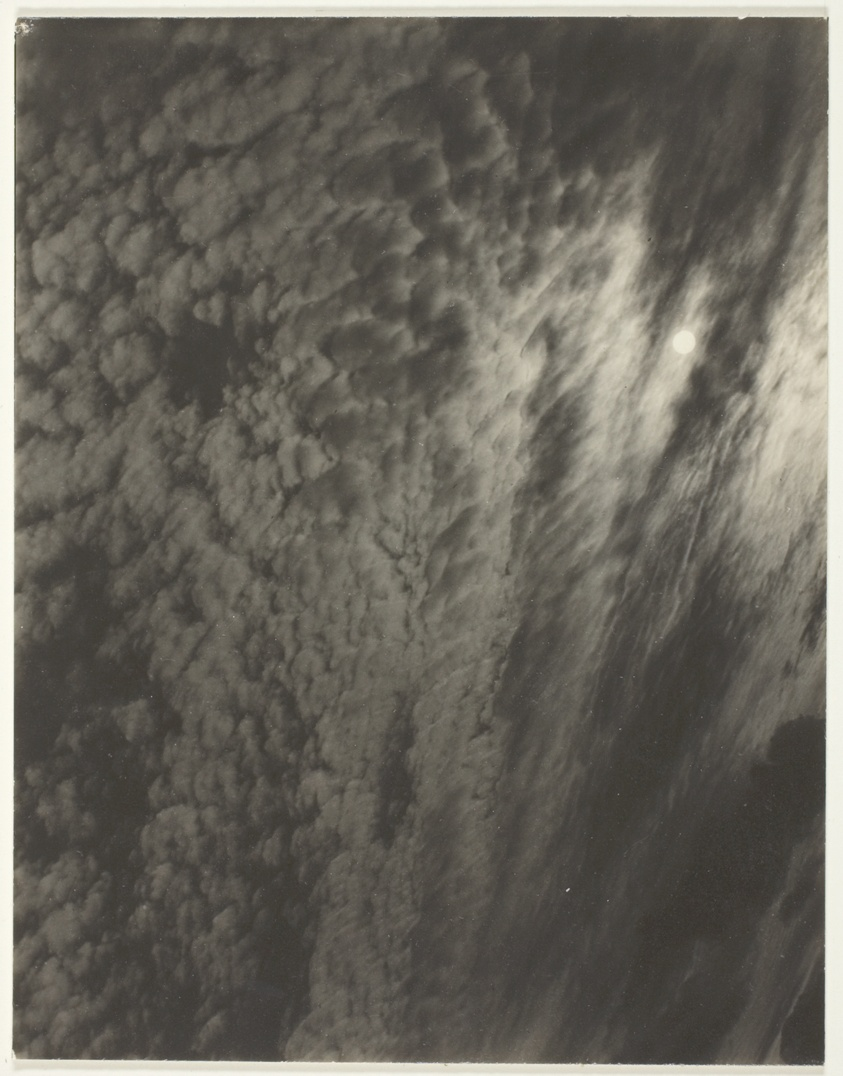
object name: Photograph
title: Equivalent, from Set A (Third Set, Print 3)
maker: Alfred Stieglitz (American, 1864–1946)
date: 1929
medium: Gelatin silver print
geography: United States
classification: gelatin silver (developing-out-paper) pr; photographic process; photography; photograph